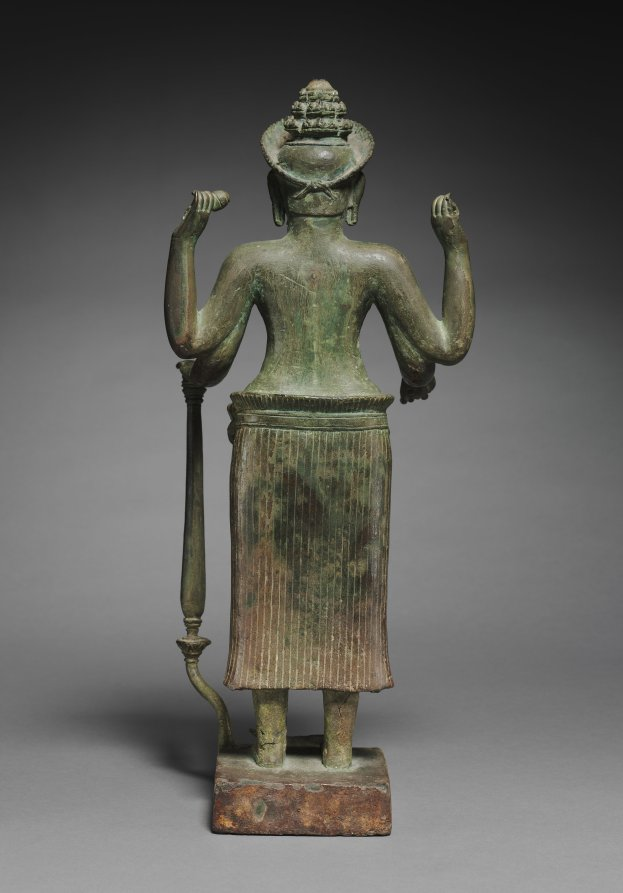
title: Durga as the Slayer of the Buffalo Demon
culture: Cambodia, probably Koh Ker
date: 900s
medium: bronze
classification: Sculpture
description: This depiction of Durga is rare and important, as it is a large-scale example of the goddess in bronze. Her conquest over the buffalo demon is indicated by its severed head at her feet. She stands four-armed and triumphant, with a wheel, conch shell, mace, and clod of earth in her hands.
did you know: The figure wears a head-dress, kirita-makuta, a diadem tied in the back and pointed at top.